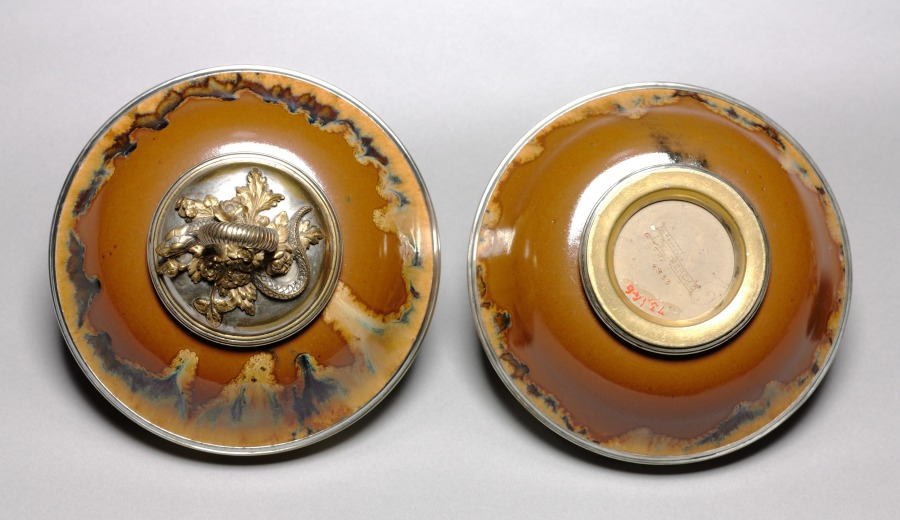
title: Covered Bowl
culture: France, late 19th-early 20th Century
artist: Auguste Delaherche (French, 1857–1940)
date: c. 1899–1900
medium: stoneware with metal mounts, silvered and gilded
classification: Ceramic